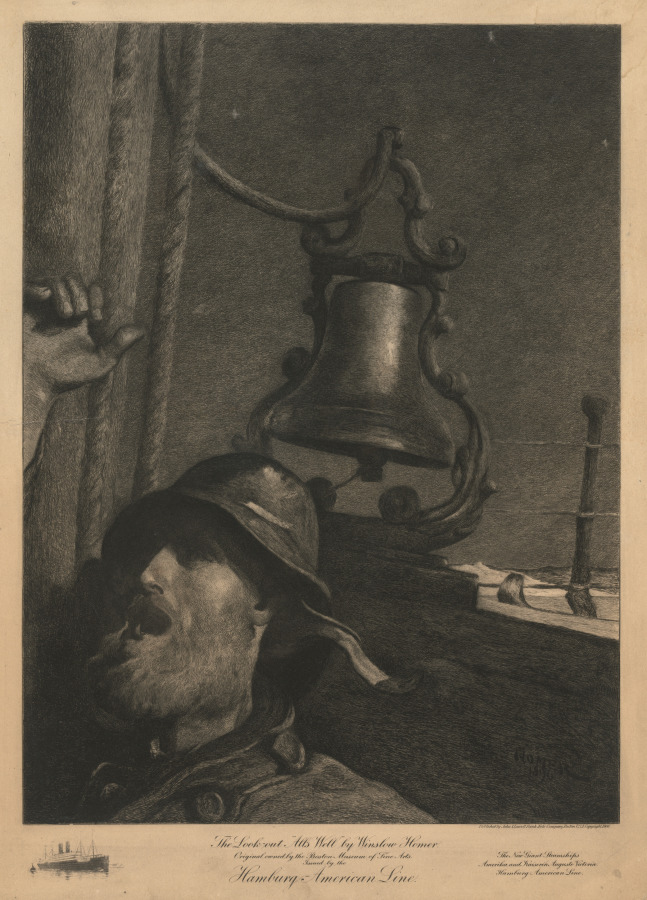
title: All's Well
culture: America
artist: Winslow Homer (American, 1836–1910)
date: c. 1906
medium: etching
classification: Print